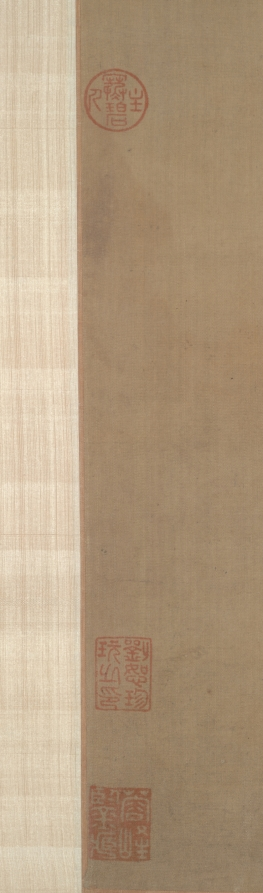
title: Lonely Retreat Overlooking a Misty Valley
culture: China, Ming dynasty (1368–1644)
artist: Sheng Maoye (Chinese, active early 1600s)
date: 1630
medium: hanging scroll; ink and slight color on silk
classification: Painting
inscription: Artist's inscription, signature, and 2 seals: In the tenth month of the gengwu year of the Chongzhen era [1630]. Sheng Maoye [seals] Sheng yin Maoye; Yuhua shi.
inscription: 4 additional seals of Liu Shu (1759–1816)